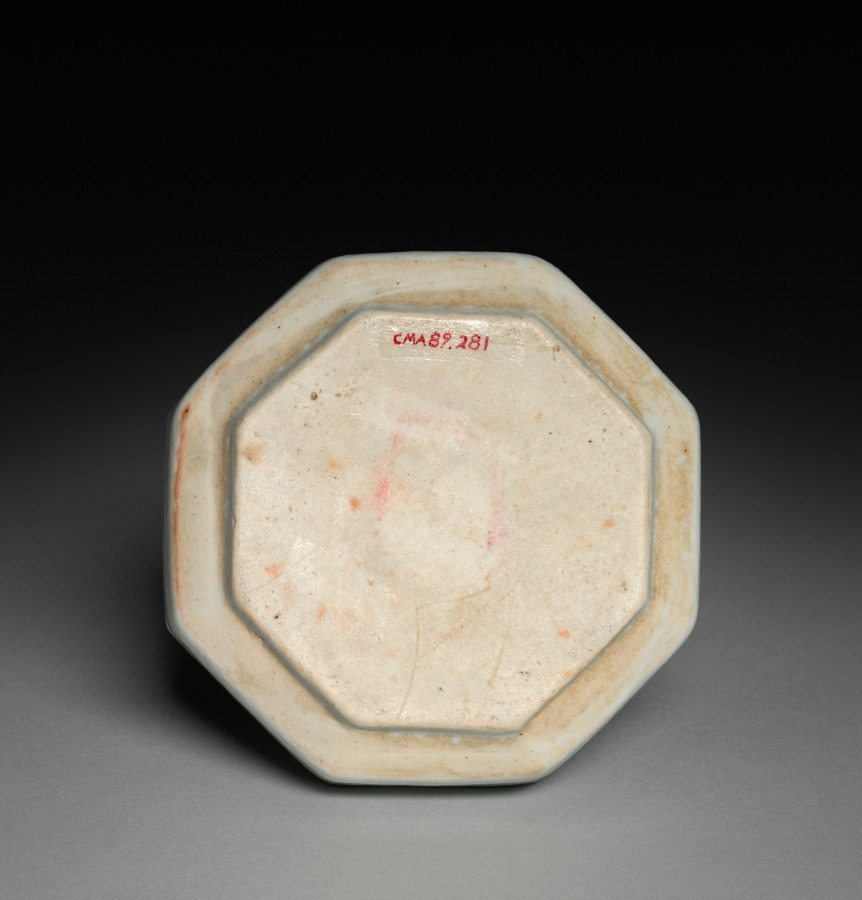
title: Hexagonal Covered Box with Lions in Relief: Qingbai Ware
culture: China, Jiangxi Province, Jingdezhen kilns, Yuan dynasty (1271–1368)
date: 1300–1325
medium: glazed porcelain with molded and applied decoration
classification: Ceramic